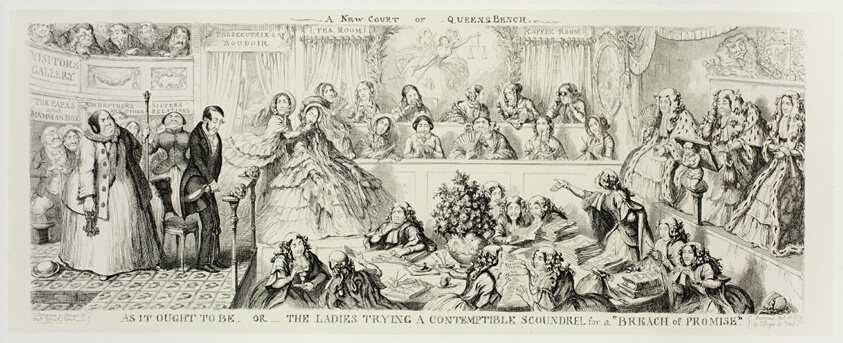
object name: Print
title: As It Ought to Be or The Ladies Trying a Contemptible Scoundrel for a "Breach of Promise" from George Cruikshank's Steel Etchings to The Comic Almanacks: 1835-1853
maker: George Cruikshank (English, 1792-1878); published by Pickering & Chatto (English, 19th century)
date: 1850, printed c. 1880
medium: Steel etching in black on cream India paper, laid down on off-white card (chine collé)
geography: England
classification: etching; paper; steel; print; prints and drawing